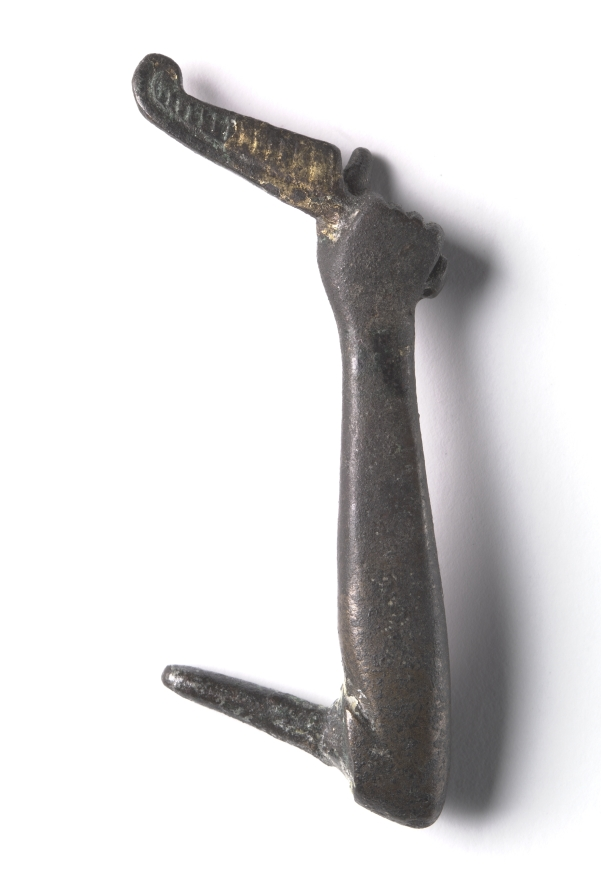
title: Bronze Mount from a "Shawabty Bundle": Arm with Scribe's Palette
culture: Egypt, Thebes, Wadi Qubbanet el-Qirud, New Kingdom (1540–1069 BCE), Dynasties 18–19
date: c. 1336–1256 BCE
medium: bronze with traces of gilding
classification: Funerary Equipment